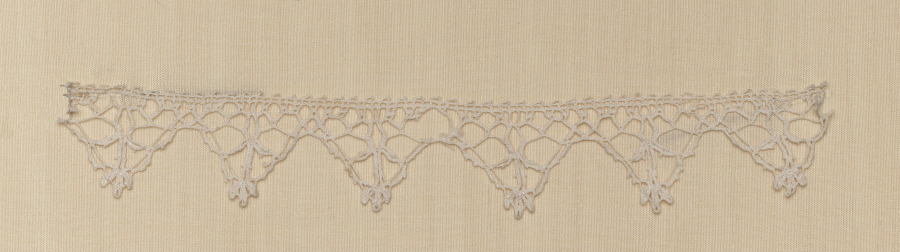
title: Lace Edging of Points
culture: Italy, Venice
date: 1580–99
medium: Bobbin lace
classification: Lace